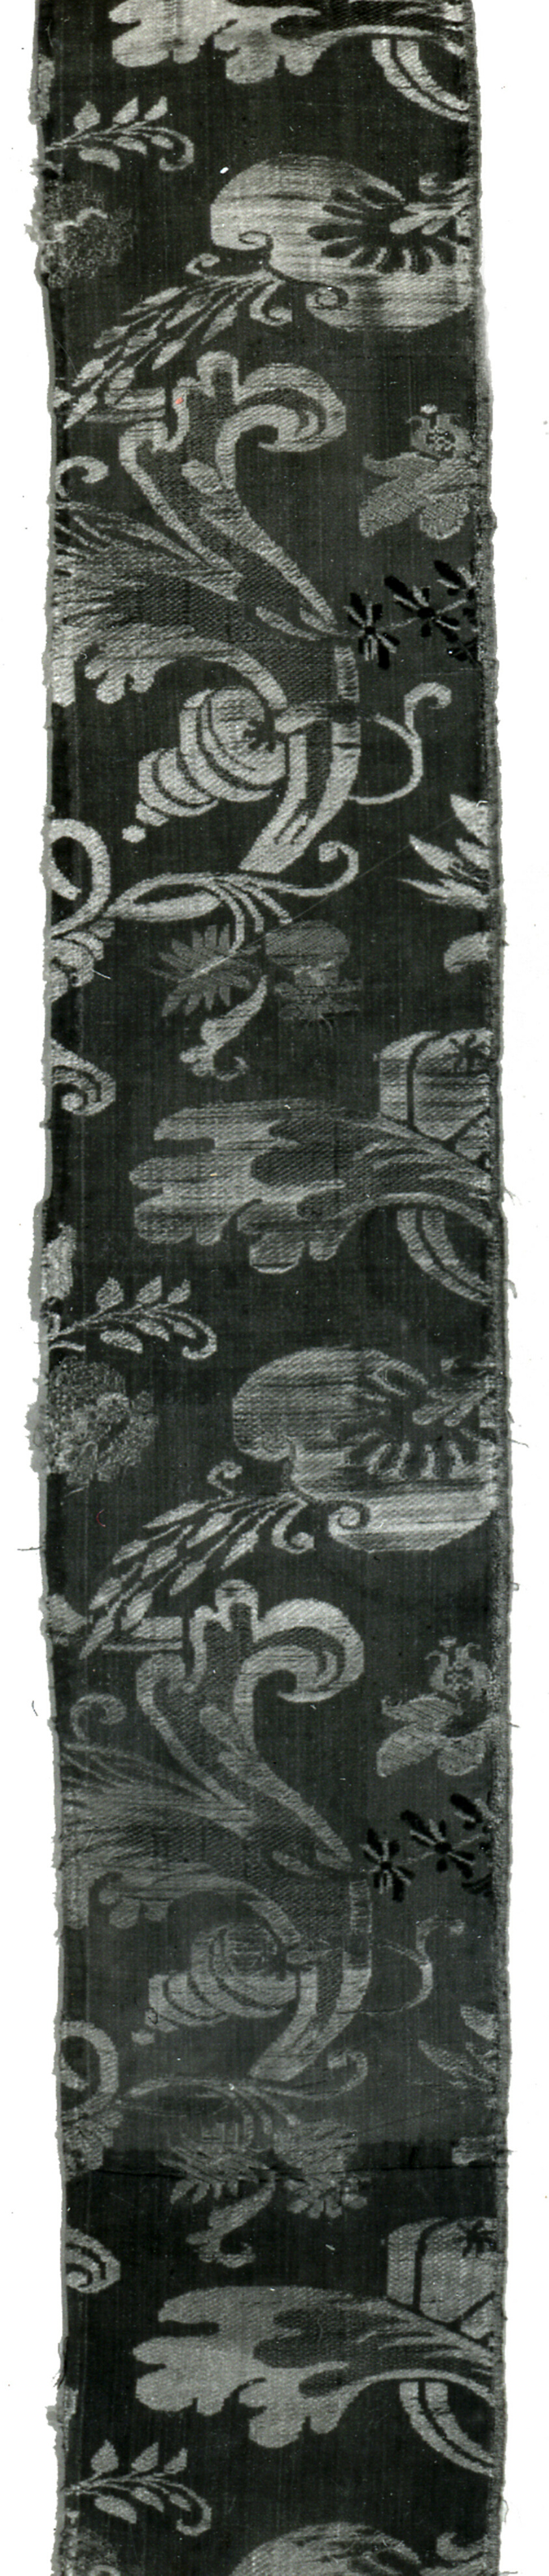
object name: Textile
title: Fragment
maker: France or Italy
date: Late 18th century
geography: Italy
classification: textile; weaving